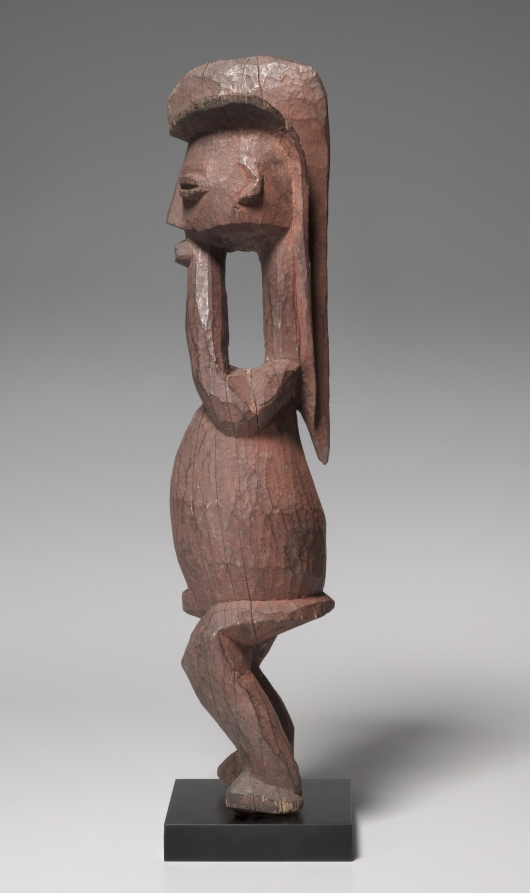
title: Male Figure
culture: Africa, Central Africa, Democratic Republic of Congo, Hungaan-style maker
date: mid- to late 1800s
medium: Wood and colorant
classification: Sculpture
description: Hungaan figures of this size served as guardians of ritual shrines and functioned in rituals to promote fertility, guarantee well-being, and ensure longevity. The striking crested hairstyle imitates a real coiffure or a wig, indicative of status and prestige. The hands supporting the chin identify the figure as a chief who is immersed in thought and contemplation, pondering over his responsibilities.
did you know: The red powdery surface of this figure mimics a red body adornment that mixed ground camwood with palm oil.